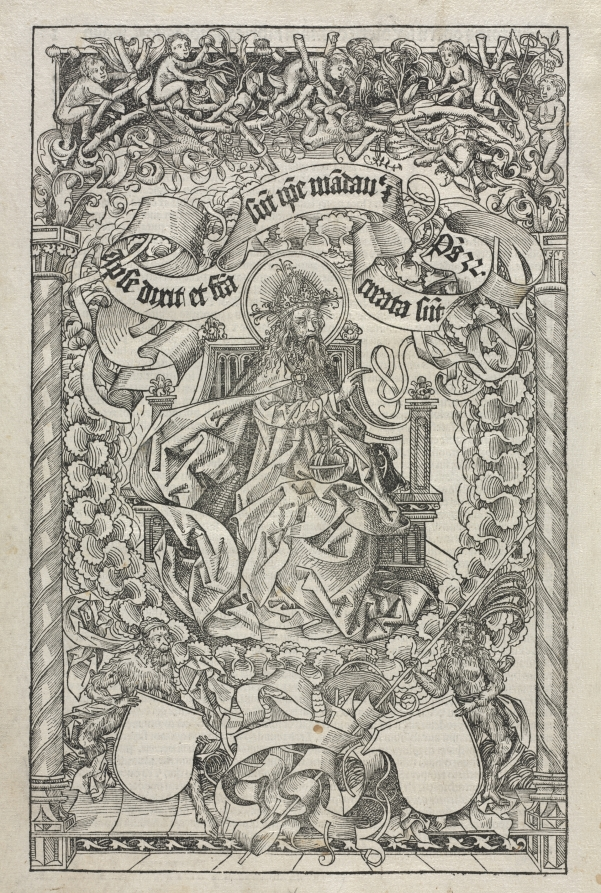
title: The Emblem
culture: Germany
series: Nuremberg Chronicle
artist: Michael Wolgemut (German, 1434–1519)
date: 1493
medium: woodcut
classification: Print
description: In Christian belief, God speaks the world into existence, creating it and ruling over it. This woodcut is one of over 1,000 images in the Nuremberg Chronicle, an early printed book narrating the history of the Christian world. Amid creeping vines and pillars of cloud, God sits enthroned, lips parted and hand upraised in a gesture of speaking. He holds an orb as a sign of his authority over the universe. The scroll above him reads: “For he [God] spoke and they were made: he commanded and they were created. Psalm 22.” Here, God is eternally powerful.